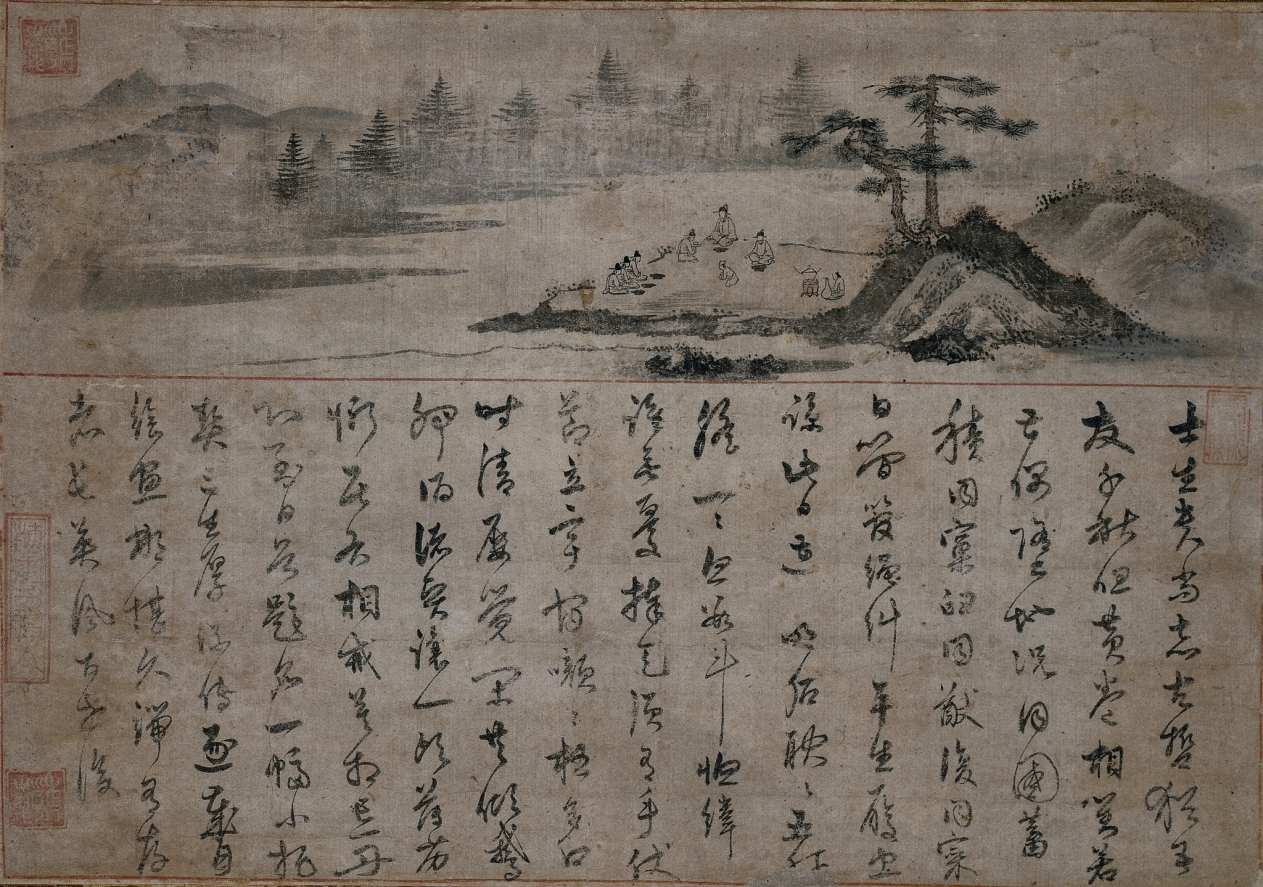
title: Gathering among the Members of Office Censor-General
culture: Korea, Joseon dynasty (1392–1910)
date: 1700s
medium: hanging scroll with calligraphy, ink and light colors on paper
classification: Painting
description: In the early Joseon period, paintings of scholar-officials’ gatherings (gyehoedo) gained popularity among the Korean elite. This painting was commissioned by Sim Eongwang, an official of the Joseon court, to depict a miwon gyehoedo, a gathering of cabinet members (saganwon). This meeting is assumed to have been ordered around the time when Sim was the head of the saganwon in 1530. At the bottom of the painting, he added his poem to express a "literati respect for high spirituality," as stated in the first line. The poem was later recorded in his anthology titled Eochonjip (Book of Fisher Village). This painting itself, however, is an 18th-century copy of the original 16th-century painting.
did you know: The gathering portrayed in this painting took place in the 16th century, but the painting itself is a later copy, possibly of the 18th century.